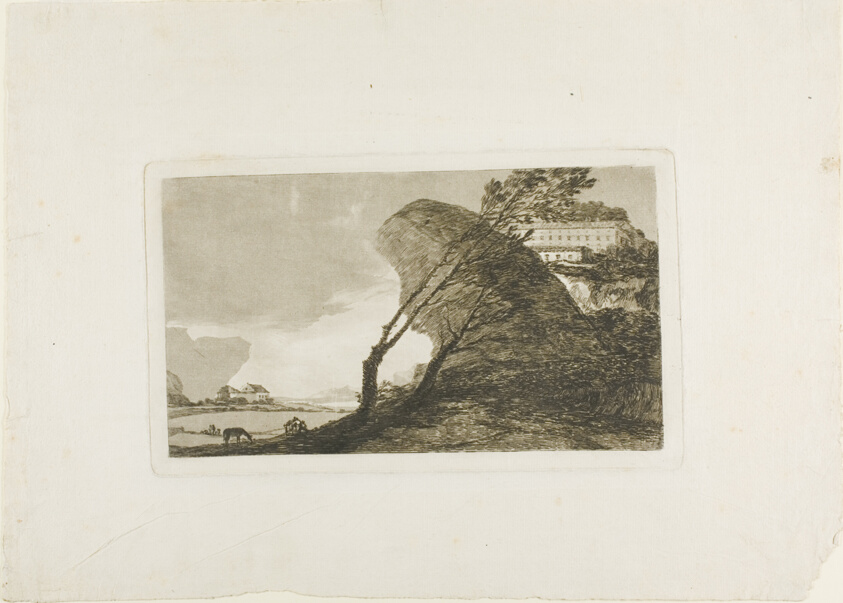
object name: Print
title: The Big Rock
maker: Francisco José de Goya y Lucientes (Spanish, 1746-1828)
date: before 1810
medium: Etching and burnished aquatint on laid paper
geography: Spain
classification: etching; print; prints and drawing